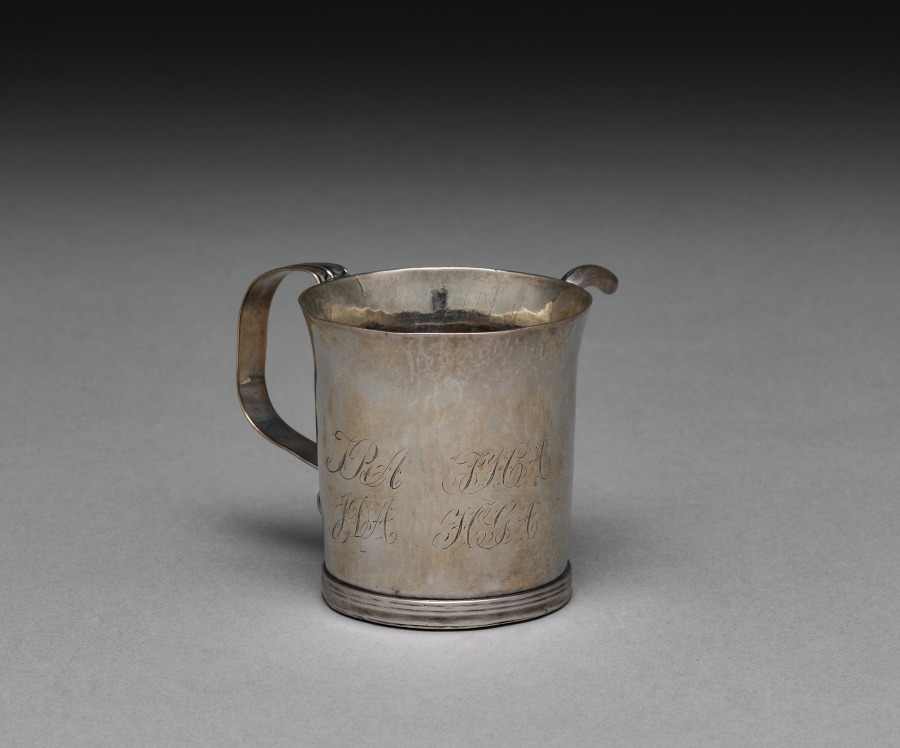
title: Spout Cup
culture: America, Massachusetts, Barnstable, 18th century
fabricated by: Moody Russell (American, 1694–1761)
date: c. 1720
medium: silver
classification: Silver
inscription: engraved ""TRA/JDA" and "THA/HGA" in bright-cut script on side, and "F" over "IM" on bottom.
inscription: Stamped on side: "MR".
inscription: Engraved underside: "F".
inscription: Scratched underside: multiple illegible words